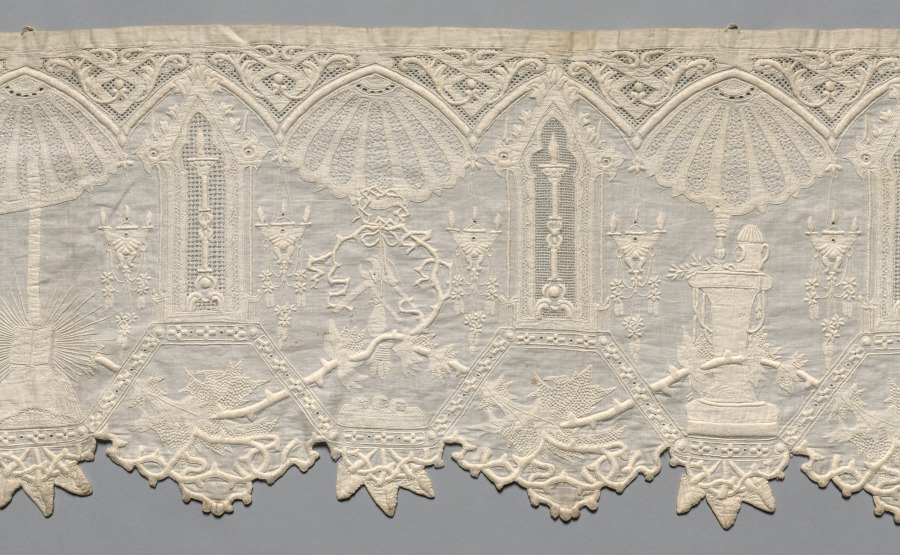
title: Altar Cloth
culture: Italy(?)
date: 1800s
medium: Plain weave cotton: needle lace (drawnwork), appliqué, and embroidery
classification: Embroidery